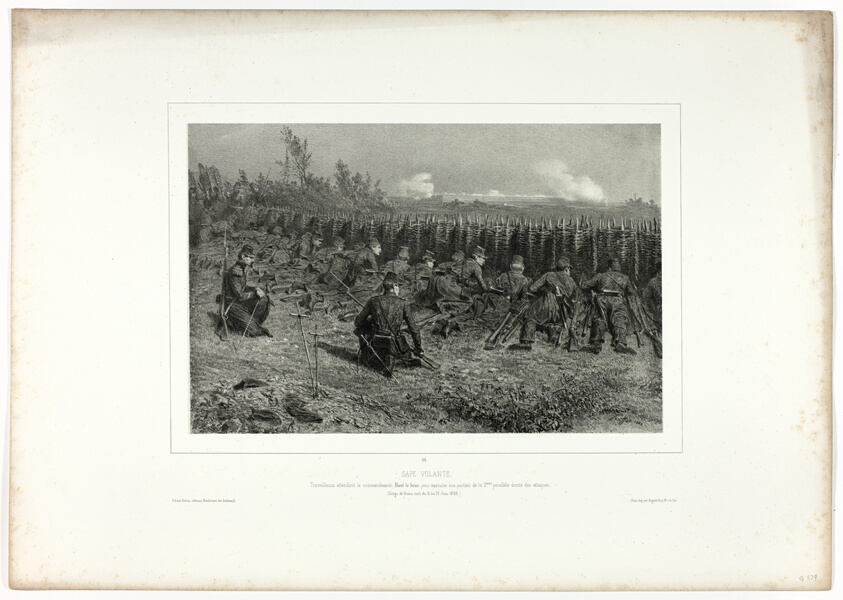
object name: Print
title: Travelling sappers, from Souvenirs d’Italie: Expédition de Rome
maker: Denis Auguste Marie Raffet (French, 1804-1860); printed by Auguste Bry (French, 19th century); published by Chez Gihaut Frères (French, 19th century)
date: 1853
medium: Lithograph in black on warm ivory wove chine laid down on off-white wove paper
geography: France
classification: lithograph; print; prints and drawing